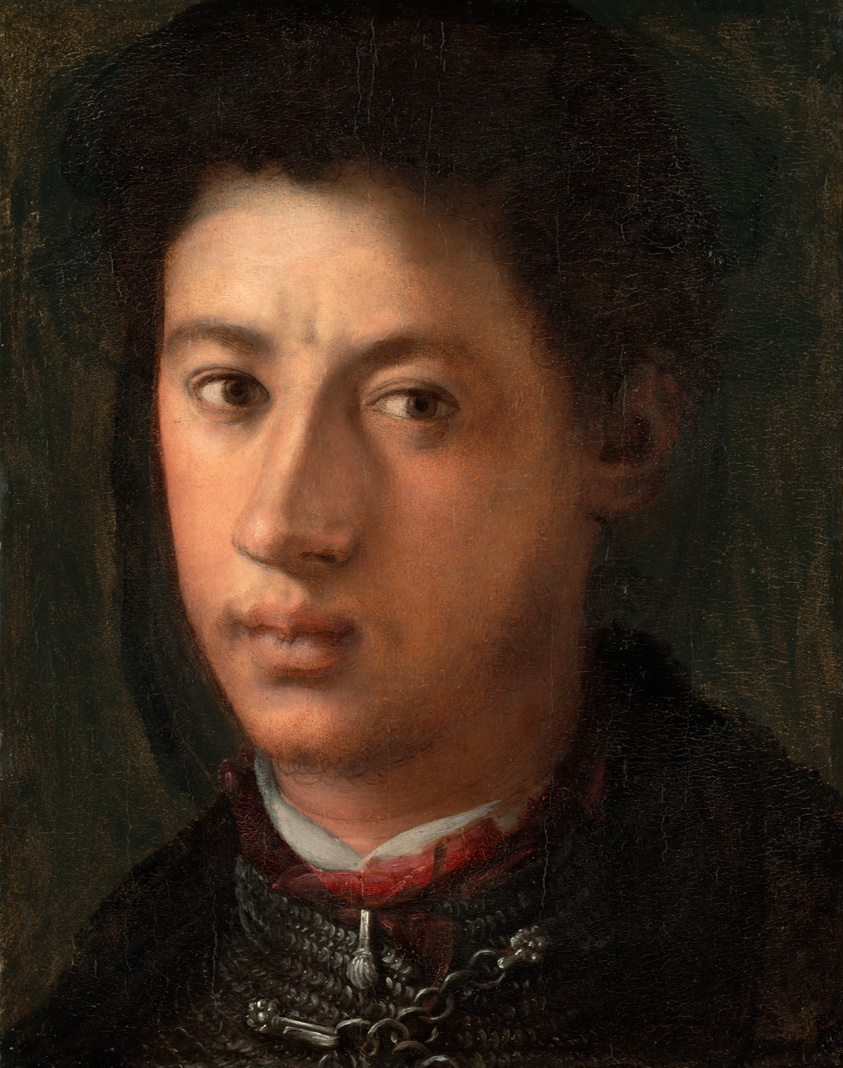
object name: Painting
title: Alessandro de' Medici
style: 16th Century, sixteenth century, Renaissance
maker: Jacopo da Pontormo (Jacopo Carrucci; Italian, 1494-1557)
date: 1534/35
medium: Oil on panel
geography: Italy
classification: oil on panel; oil paintings (visual works); paint; Italian; painting; european painting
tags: portraits: male subject, wealth, portraits, portrait, man, luxury, head, chains, armor